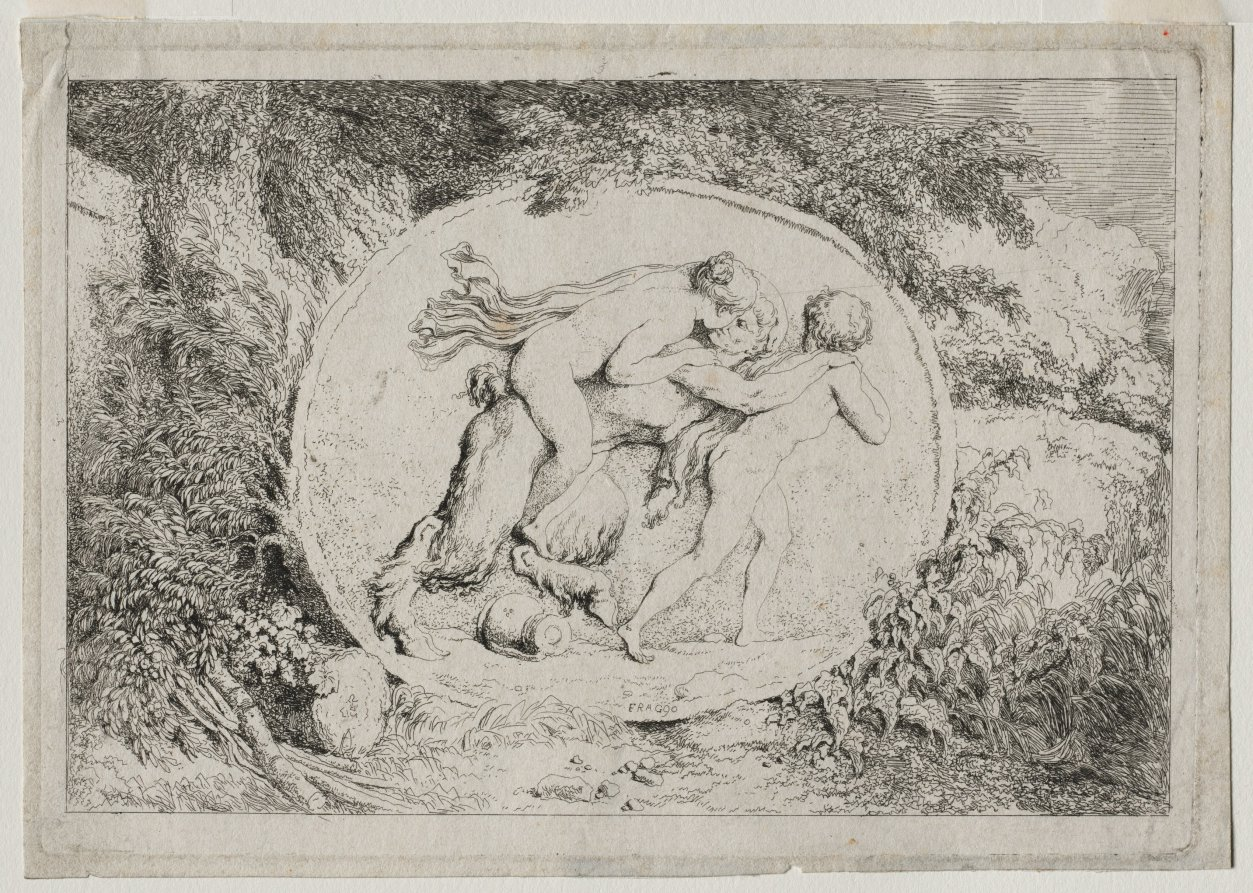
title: Bacchanales: Nymph Astride a Satyr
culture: France, 18th century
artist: Jean-Honoré Fragonard (French, 1732–1806)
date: 1763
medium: etching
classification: Print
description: Jean-Honoré Fragonard made these four etchings shortly after returning to Paris from Italy, where he studied antique subjects and sculpture. He may have also looked at other sources for inspiration, such as Jacques François Joseph Saly’s suite of vase designs. Though the prints feature the followers of Bacchus, the wine god does not make an appearance. Instead, Fragonard highlighted the playfully erotic frolics, conflicts, and even family life of a group of bacchants, conceiving them as low-relief sculptures on stone fragments within abundant foliage. Fragonard’s creations helped to popularize revelries in nature in French art, architecture, and garden design during the later 1700s.